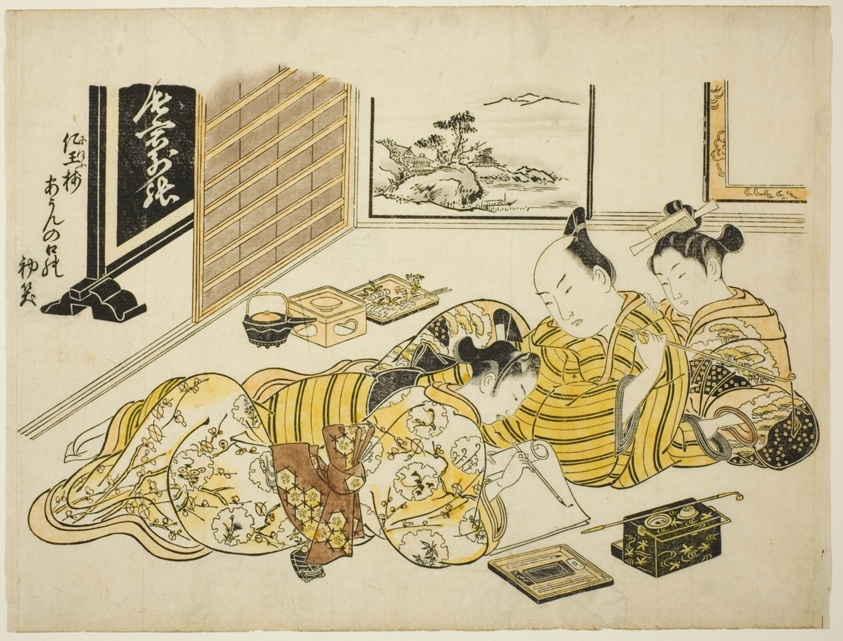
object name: Print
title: A Man and a Courtesan Watching a Young Man Writing, first sheet of the album "Mountain of Dyed Color, Specimens of Bedrooms (Someiro no yama neya no hinagata)"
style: Japanese (culture or style)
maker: Okumura Masanobu (Japanese, 1686-1764)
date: c. 1739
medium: Hand-colored woodblock print; oban, sumizuri-e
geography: Japan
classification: woodblock print; print; asian art